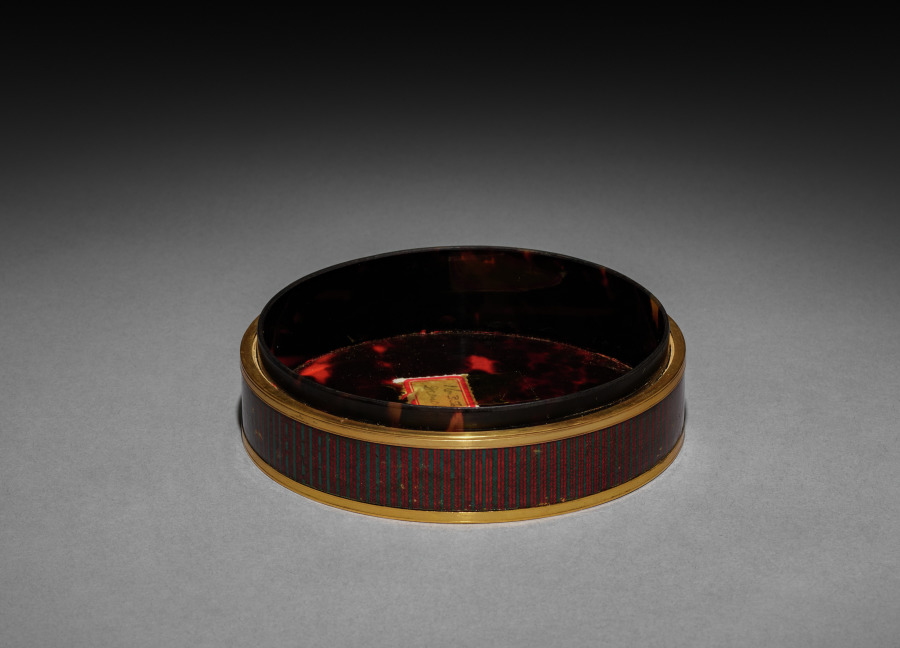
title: Snuff Box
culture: France, 18th century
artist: after François Boucher (French, 1703–1770)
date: 1780–1800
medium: gold or gilt metal mounts; sides and bottom enamel over gilt engine turned design; interior lined in tortoiseshell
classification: Miscellaneous